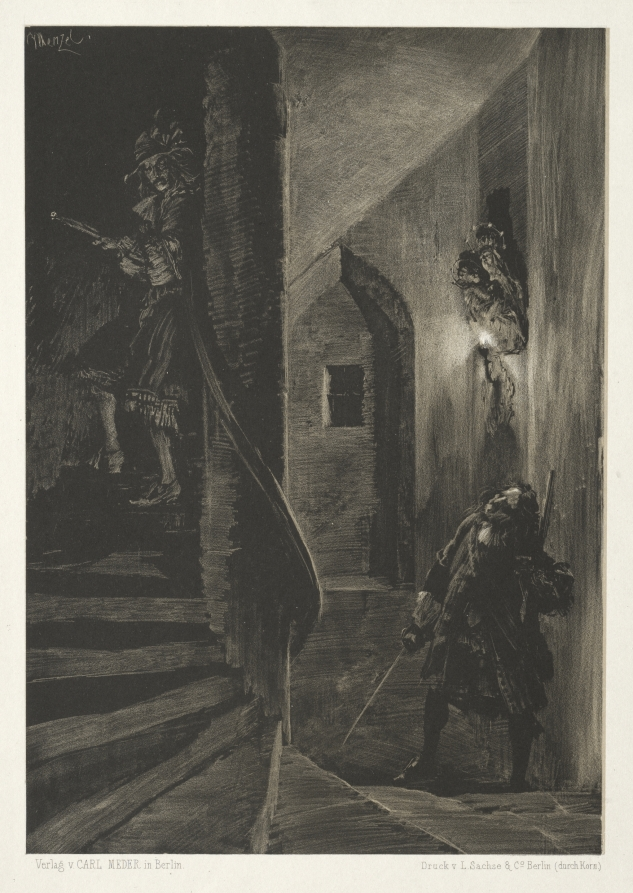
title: Essay on Stone with Brush and Scraper: Chase on the Winding Staircase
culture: Germany, 19th century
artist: Adolph von Menzel (German, 1815–1905)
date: 1851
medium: lithograph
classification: Print